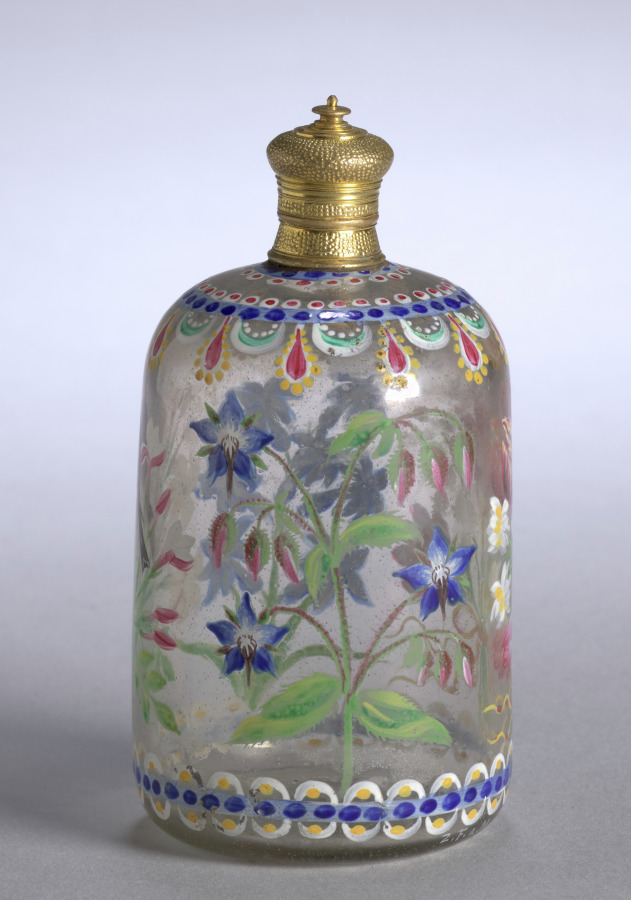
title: Scent Bottle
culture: Germany, 18th century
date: 1700s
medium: glass with enamel decoration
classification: Miscellaneous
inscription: signed: Z. F. a M.